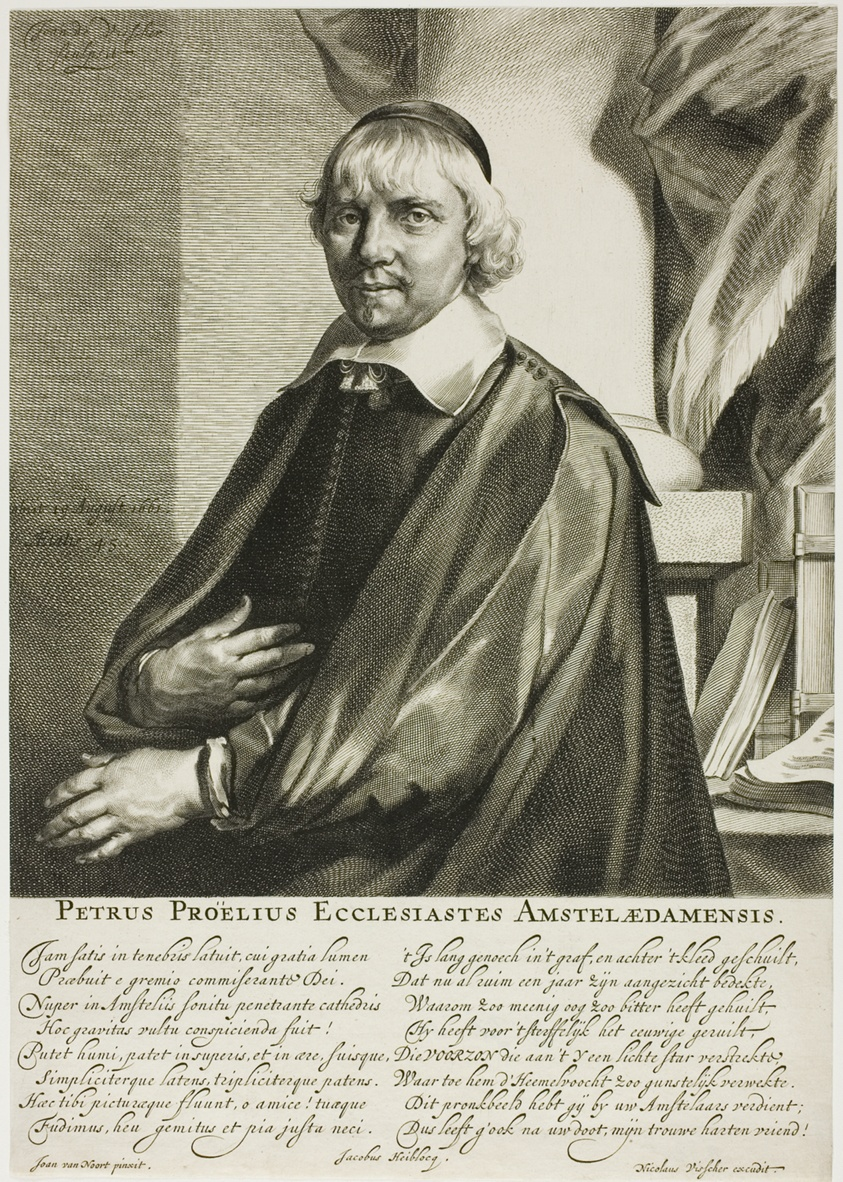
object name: Print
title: Petrus Proclius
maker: Jan Visscher (Dutch, 1634-1692); after Jan van Noordt (Dutch, active 1645-1675)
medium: Engraving on paper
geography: Holland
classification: engraving; print; prints and drawing